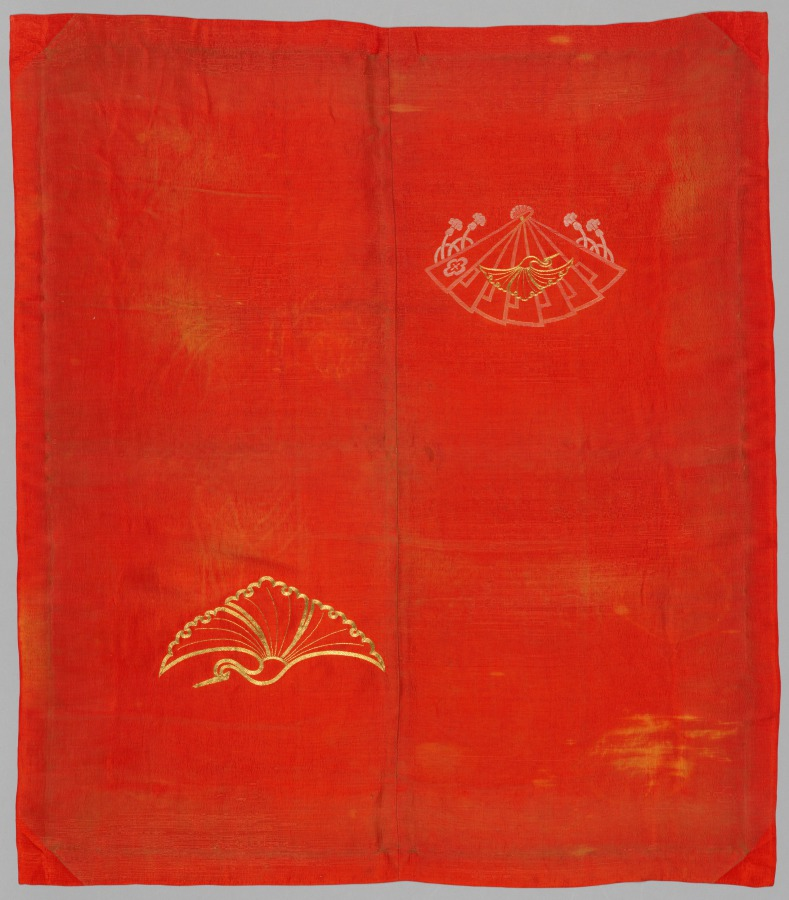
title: Embroidered and Resist-Dyed Fabric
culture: Japan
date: late 1800s-early 1900s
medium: embroidered silk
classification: Embroidery